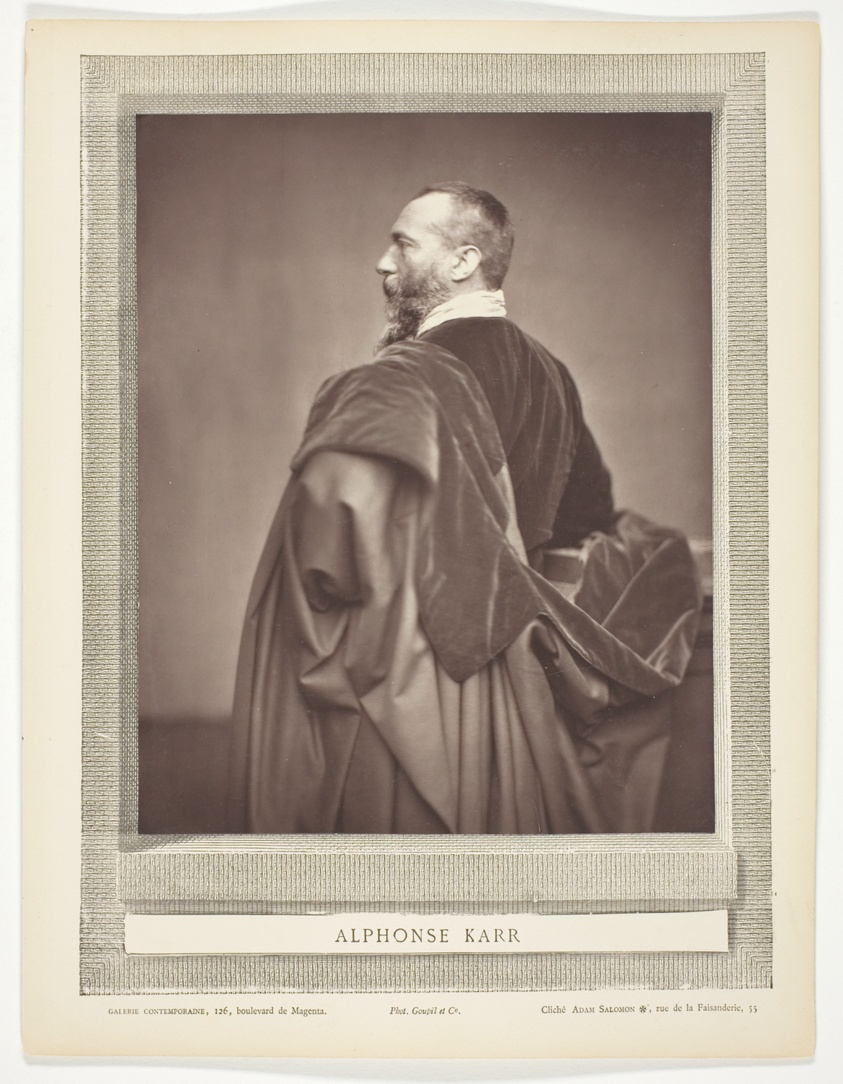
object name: Photograph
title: Jean-Baptiste Alphonse Karr (French critic, journalist, and novelist, 1808-1890)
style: 19th century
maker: Antoine Samuel Adam-Salomon (French, 1811–1881)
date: c. 1876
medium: Woodburytype, from the periodical “Galerie Contemporaine Littéraire, Artistique” (1877), volume 2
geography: France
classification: woodburytype; photomechanical process; photography; photograph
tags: Collected by Hugh Edwards, Contemporaine Littéraire